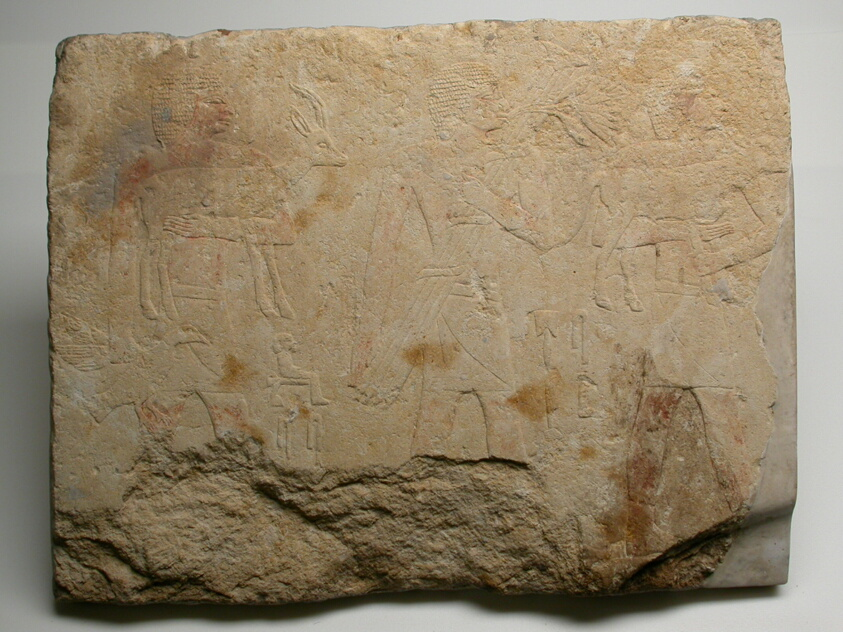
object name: Architectural fragment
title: Wall Fragment from a Tomb Depicting Three Offering Bearers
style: old kingdom, fifth dynasty, egyptian, ancient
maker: Egyptian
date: Old Kingdom, Dynasty 5 (about 2495–2345 BCE)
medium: Limestone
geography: Egypt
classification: architectural fragment; stone; sculpture; ancient art; funerary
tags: men, animals, birds, calfs, flowers, plants